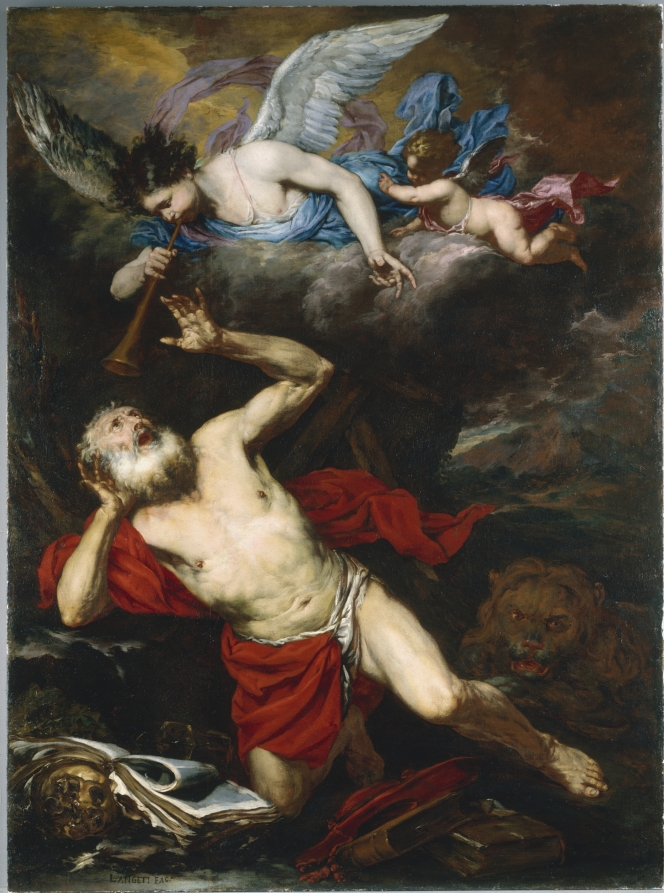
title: The Vision of Saint Jerome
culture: Italy, 17th century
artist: Giovanni Battista Langetti (Italian, 1635–1676)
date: c. 1660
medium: oil on canvas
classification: Painting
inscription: Signed lower left: "LANGETI FAC.at"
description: Jerome (c. AD 347–420) studied Greek and Latin literature in Rome, but eventually pursued theology, perceiving his conduct as corrupt and sinful. Around AD 374, Jerome had a vision of the Last Judgment in which an angel called him to task for his transgressions. Jerome then withdrew from society, learned Hebrew, and studied the Gospels, which led to his influential translations of the Bible. Langetti here follows a convention by depicting Jerome's vision after he retreated from the world. Working in the northern Italian port of Genoa, Langetti absorbed Caravaggio's impact, seen in the composition's naturalistic bodies and dramatic light.